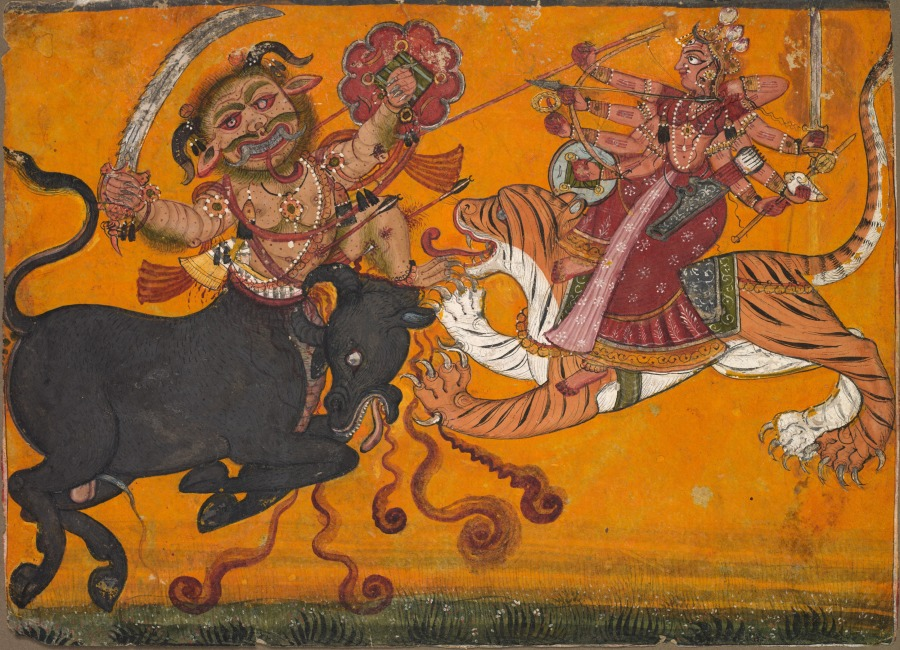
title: Durga Slaying Mahisha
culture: Northern India, Pahari kingdoms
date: c. 1700–1710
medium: Gum tempera and gold on paper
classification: Painting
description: Durga is the name of the goddess who personifies the sum total of the powers of all the male gods combined. When she vanquishes the fierce buffalo demon named Mahisha, she is described as having many arms, each holding a different weapon: bow and arrow, trident, discus, shield, sword, mace, and the conch shell that sounds the start of battle. The horizontal lines on her arms are sectarian markings. At the moment depicted in this painting, she has succeeded in beheading the buffalo demon and shooting arrows into his true form that climbs from its neck. Artists in the foothills of the western Himalayas, where this work was made, depicted Durga’s mount as a tiger—lions and tigers had synonymous meaning throughout India as emblems of shakti, or divine creative energy.